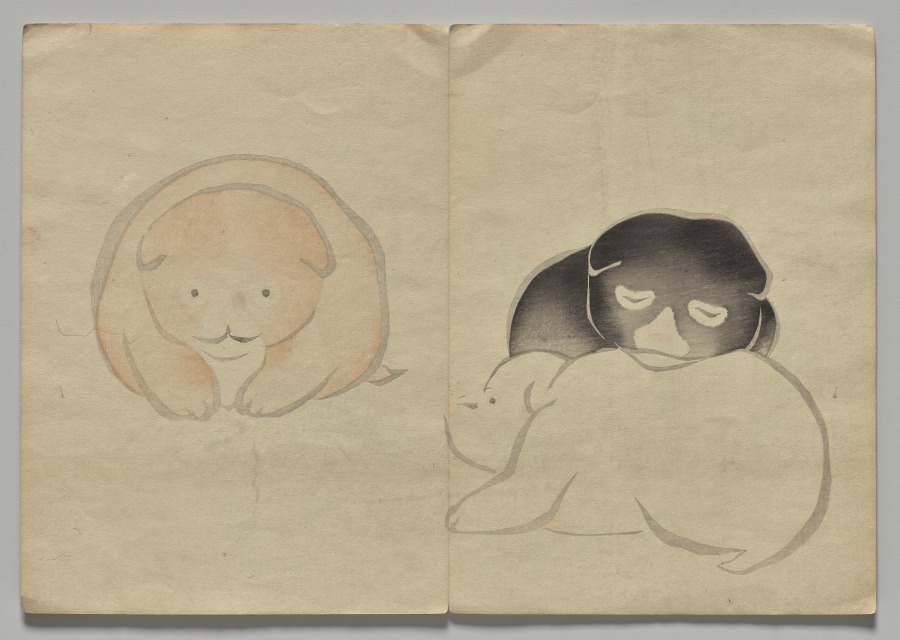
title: Scene from The Kōrin Picture Book (Volume 2)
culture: Japan, Edo period (1615–1868)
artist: Nakamura Hōchū (Japanese, d. 1819)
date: 1800s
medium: color woodblock printed book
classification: Bound Volume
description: Ogata Korin (1658-1716) was one of the most admired artists of Rimpa, or "decorative school painting." These books by the charming later-generation Rimpa artist Hochu record Korin's inventive designs.